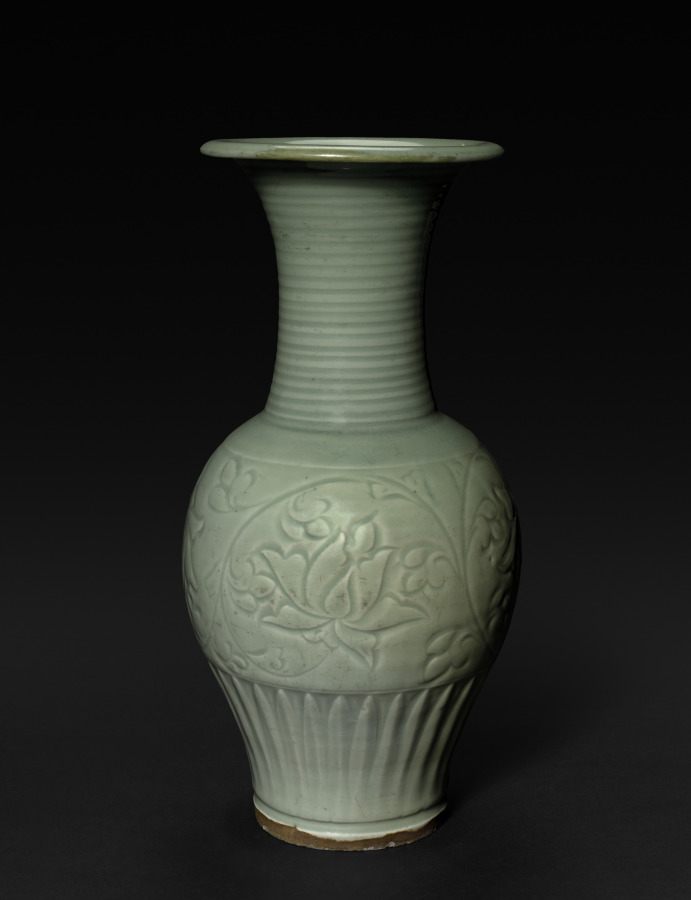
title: Vase: Celadon Ware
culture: China, Ming dynasty (1368–1644)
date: 1368–1644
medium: stoneware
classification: Ceramic